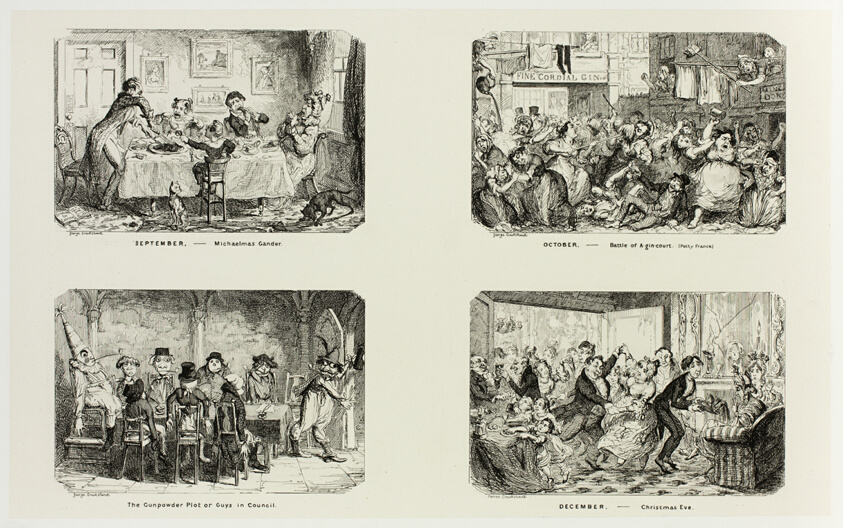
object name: Print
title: September – Michaelmas Gander from George Cruikshank's Steel Etchings to The Comic Almanacks: 1835-1853 (top left)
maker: George Cruikshank (English, 1792-1878); published by Pickering & Chatto (English, 19th century)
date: 1838, printed c. 1880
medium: Four steel etchings in black on cream India paper, laid down on off-white card (chine collé)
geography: England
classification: etching; paper; print; prints and drawing